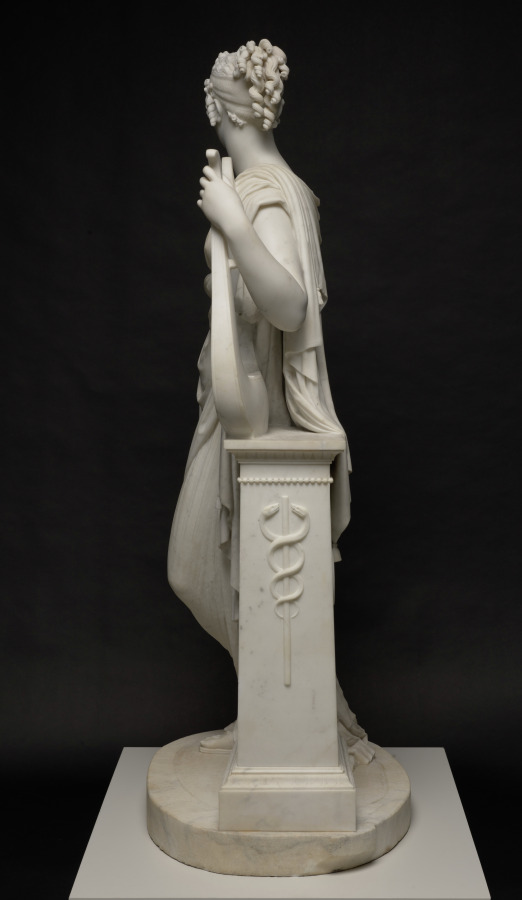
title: Terpsichore Lyran (Muse of Lyric Poetry)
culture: Italy, 19th century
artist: Antonio Canova (Italian, 1757–1822)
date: 1816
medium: marble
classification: Sculpture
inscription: inscribed on front of column: "Terpsichore Lyran" [Terpsichore as the Muse of lyric poetry]; inscribed at base of column: "Canova Fact: 1816"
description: In Greek mythology, Terpsichore was one of the nine Muses, or goddesses of creative inspiration. The lyre, the Greek inscription on the short column, and the caduceus (entwined snakes) on the side identify the figure as Terpsichore Lyran, muse of lyric poetry. This sculpture began with a commission from Napoleon's brother, Lucien, for an idealized portrait of his wife, Alexandrine. Antonio Canova made this version for a British aristocrat and exhibited it in 1817 at the Royal Academy in London to great acclaim.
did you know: Trained by his grandfather, an Italian stonemason, Canova began modeling clay and carving marble sculptures before age ten.